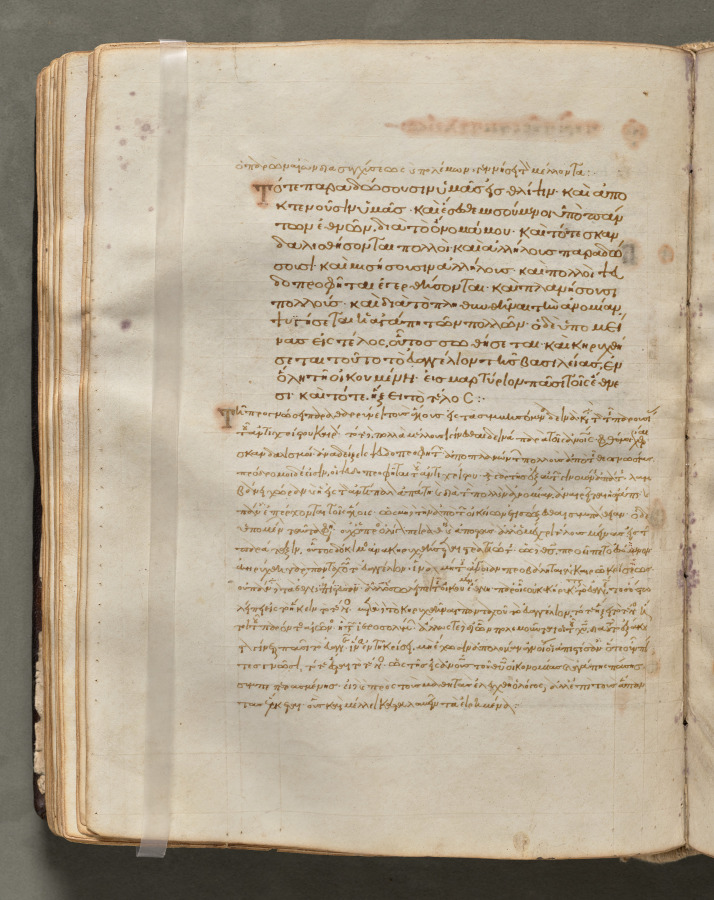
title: Text, folio 105 (verso), from a Gospel Book with Commentaries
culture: Byzantium, Constantinople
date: c. 1000–1100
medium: ink, tempera, and gold on vellum; leather binding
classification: Bound Volume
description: Each of the four gospels in this book opens on a page with brilliantly illuminated borders depicting the author of the text as well as birds-principally peacocks, symbols of the immortality of the soul-and fountains, representing the fountain of life and the salvation of the soul. This volume consists of 428 leaves with texts in Greek. Its level of sophistication suggests that it was probably written and decorated in a monastery in Constantinople.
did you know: Gospel Books were carried in procession through Byzantine churches.